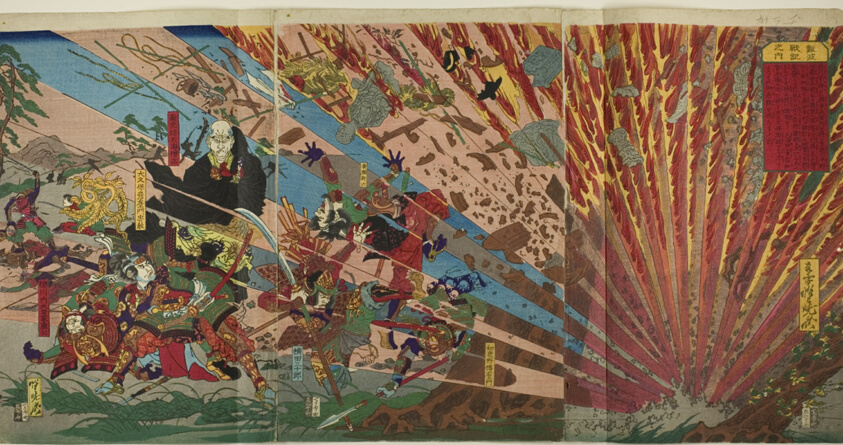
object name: Print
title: Battle of Nanba (Nanba senki no uchi)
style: Japanese (culture or style)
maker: Kawanabe Kyosai; Japanese, 1831–1889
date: after 1871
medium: Color woodblock print, triptych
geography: Japan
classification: woodblock print; print